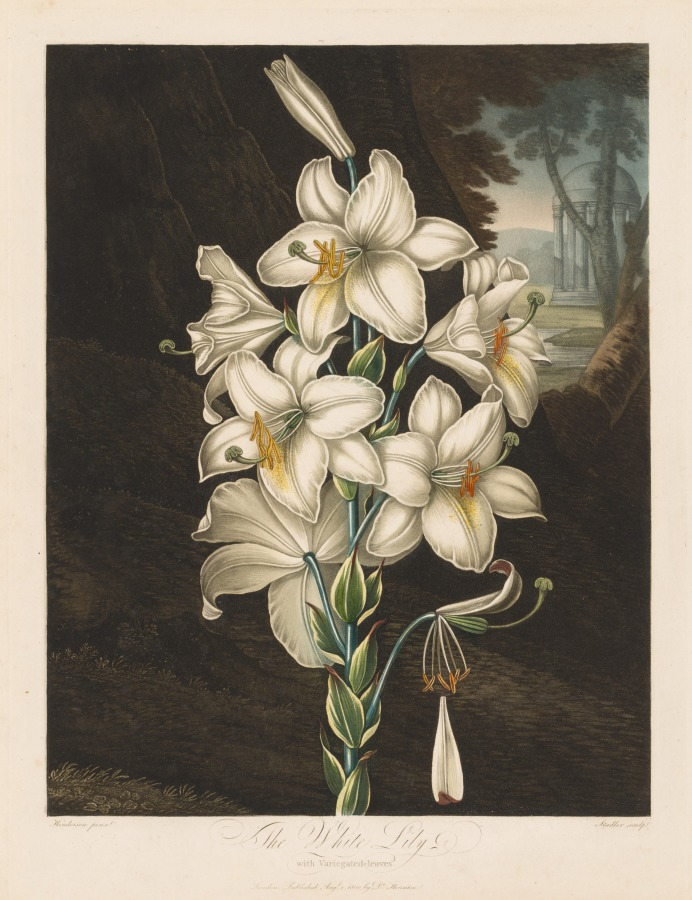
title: The Temple of Flora, or Garden of Nature: The White Lily with Variegated Leaves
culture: England, late 18th-early 19th Century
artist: Robert John Thornton (British, 1768–1837)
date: 1800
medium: aquatint, stipple and line engraving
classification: Print